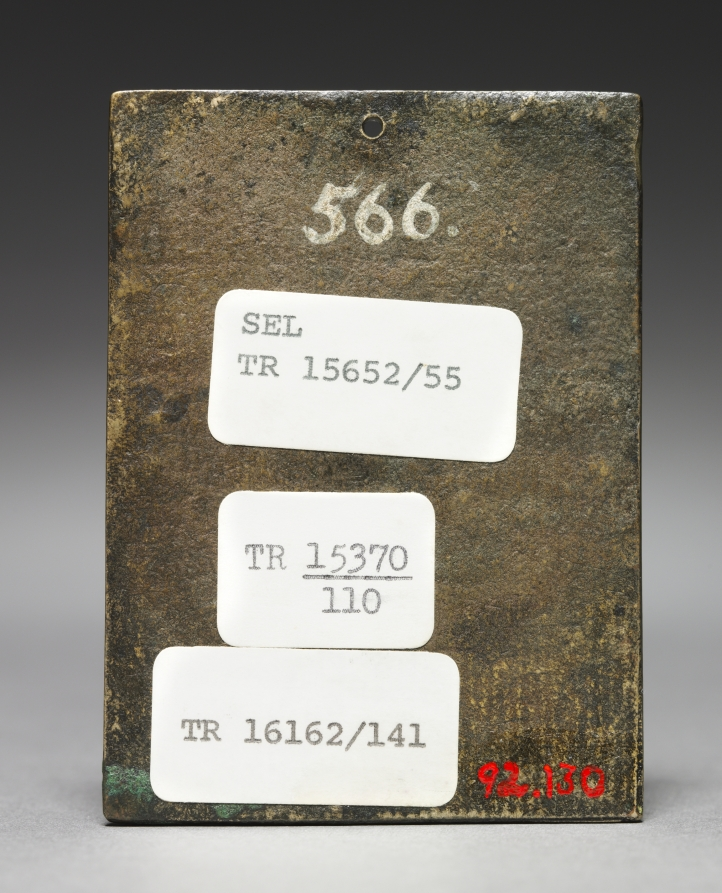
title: Saint Sebastian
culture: Italy, 16th century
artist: Moderno (Italian, 1467–1528)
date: c. 1500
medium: bronze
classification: Sculpture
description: The Corinthian capital on the central column, the broken pier with reliefs of Mars and an eagle, and the pier at left with equestrian groups around an image of Venus are all ancient motifs Moderno encountered in Rome. Originally from Verona, Moderno combined this monumental classicism of Rome with his Northern Italian roots, particularly the interest in humanism he absorbed at the court of Renaissance Ferrara. Despite the torture of arrows piercing Saint Sebastian's body, the strong musculature and graceful twist of his seminude body reflect the Renaissance ideals of beauty befitting a holy martyr.